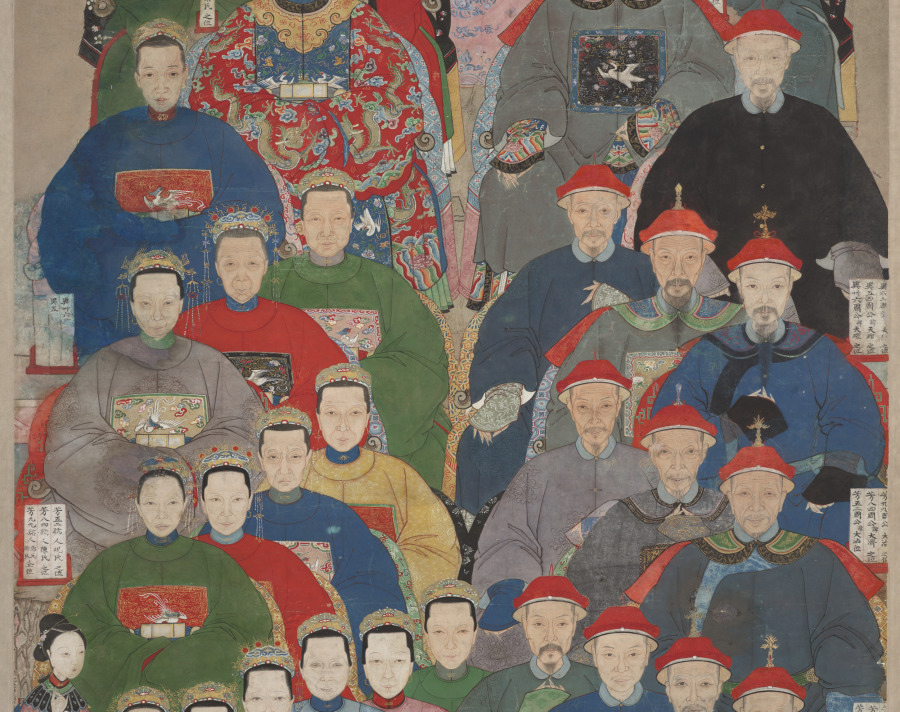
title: Ancestor Group Portrait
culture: China, Qing dynasty (1644-1911), Jiaqing period (1796-1820)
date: 1796–1820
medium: Hanging scroll; ink and color on paper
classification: Painting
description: From top to bottom this scroll features various generations of ancestors with men on the right and women on the left, 30 figures altogether. Inscribed tablets give their rank and relation within the family. Square badges on their robes indicate each figure's rank as an official. Scrolls of this type were displayed for worship at home during the New Year celebrations.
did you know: Court officials' wives could wear the same rank badge as their spouses.